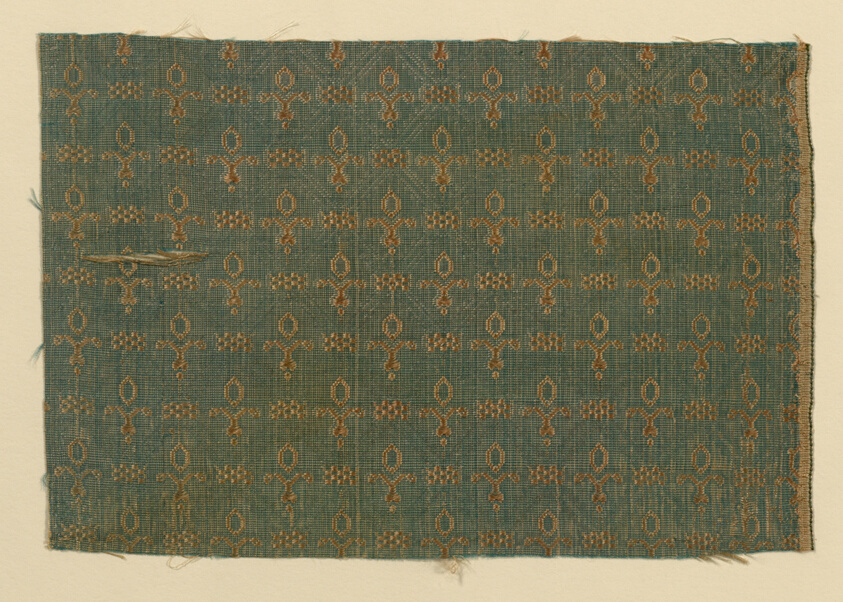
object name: Textile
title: Fragment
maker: Italy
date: 1650/1700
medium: plain compound cloth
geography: Italy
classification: textile; weaving